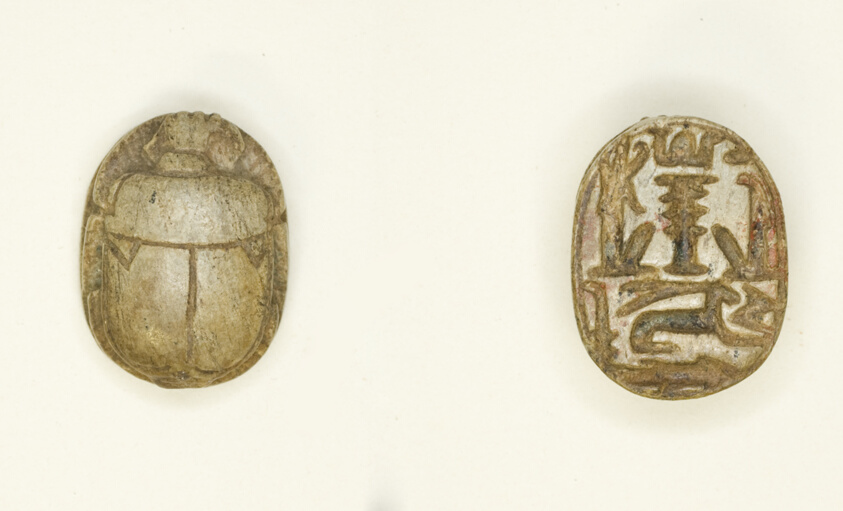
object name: Costume and Accessories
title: Scarab: Gods and Hieroglyphs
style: egyptian, third intermediate period, new kingdom, late period (egyptian), ancient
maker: Egyptian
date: New Kingdom–Late Period, Dynasties 18–26 (about 1550–525 BCE)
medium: Steatite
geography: Egypt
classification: scarab; ancient art; costume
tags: scarab beetle, rabbits, Hieroglyphs, gods (deities), deities